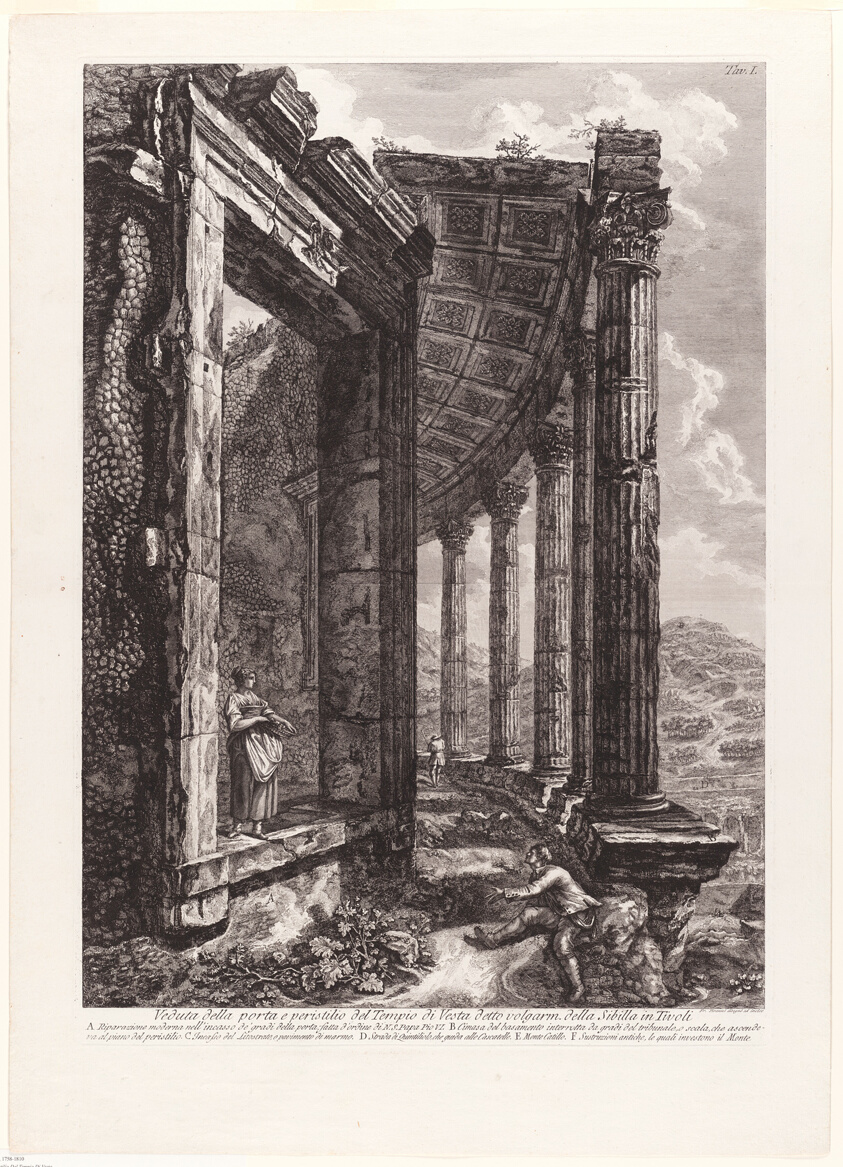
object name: Print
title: View of the Door and Peristyle of the Temple of Vesta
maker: Francesco Piranesi (Italian, 1758-1810)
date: 1780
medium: Etching on ivory laid paper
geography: Italy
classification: etching; print; prints and drawing